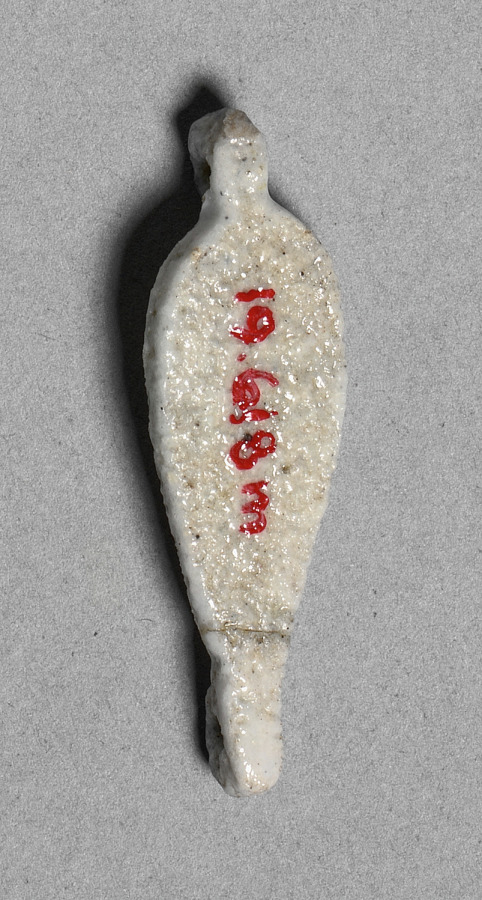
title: Petal-Shaped Bead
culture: Egypt, New Kingdom (1540–1069 BCE), Dynasty 18, reign of Amenhotep III (1390–1352 BCE)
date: c. 1391–1353 BCE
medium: faience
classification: Jewelry